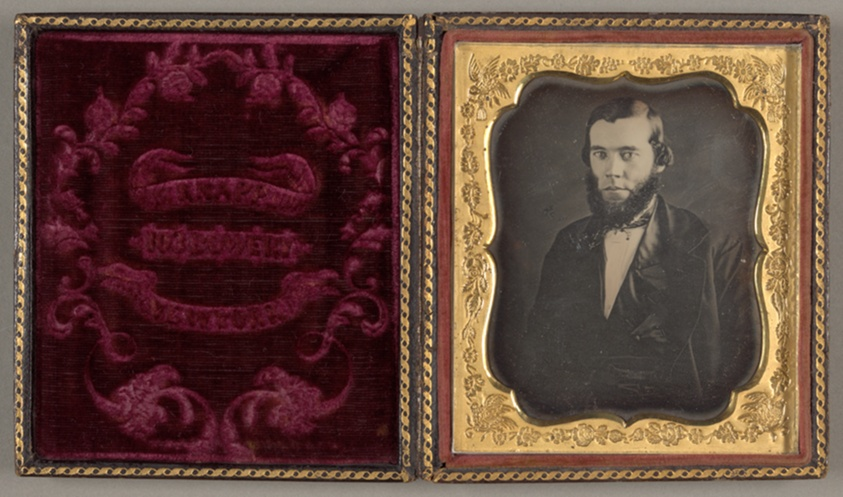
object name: Photograph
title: Untitled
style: 19th century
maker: Knapp (American, active 1850s)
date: c. 1850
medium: Daguerreotype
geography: United States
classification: daguerreotype; photographic process; photography; photograph